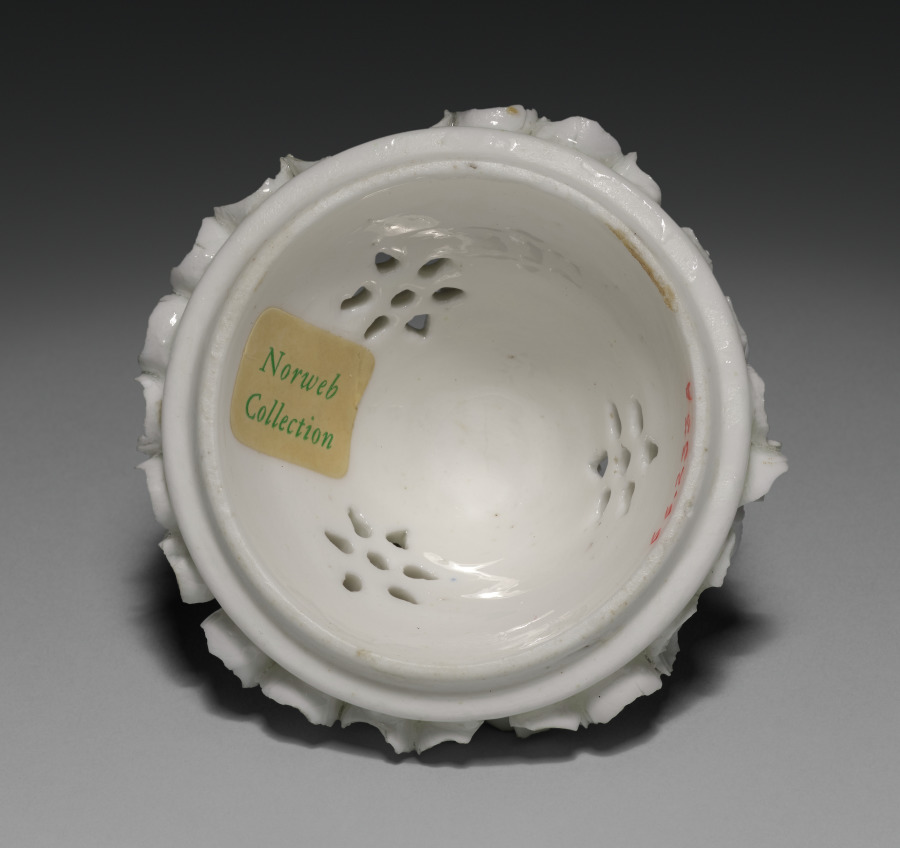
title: Cover for a Potpourri Vase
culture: France, Vincennes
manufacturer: Vincennes Porcelain Factory (France, 1740–56)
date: c. 1750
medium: soft-paste porcelain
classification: Ceramic